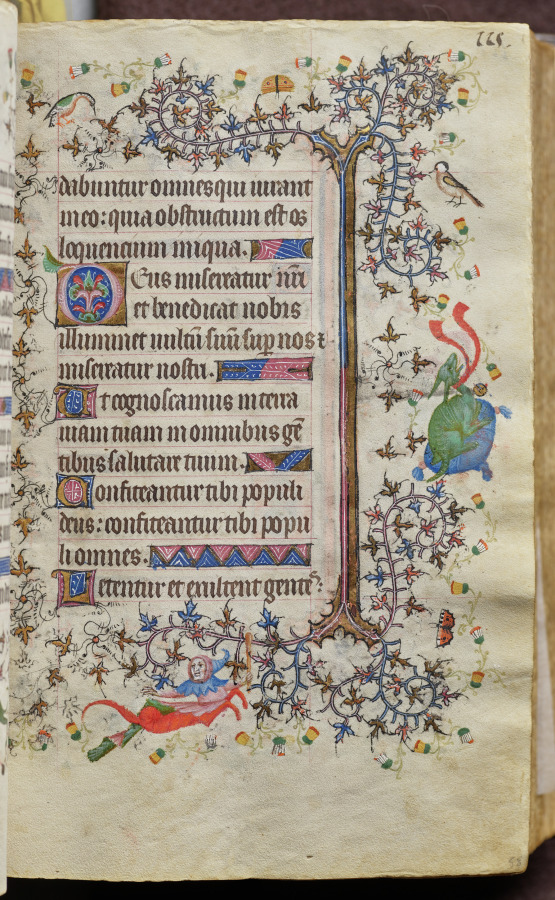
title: Hours of Charles the Noble, King of Navarre (1361-1425): fol. 58r, Text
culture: France, Paris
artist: Master of the Brussels Initials and Associates (French)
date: c. 1405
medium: ink, tempera, and gold on vellum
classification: Bound Volume